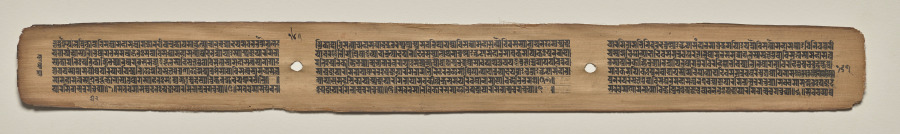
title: Text, folio 167 (verso), from a Manuscript of the Perfection of Wisdom in Eight Thousand Lines (Ashtasahasrika Prajnaparamita-sutra)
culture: Eastern India, Bihar, Vikramashila Monastery. Painting: Nepal, Kathmandu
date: Sunday, September 14, 1119 (year 239 of the Newar Samvat in the month of Ashvina)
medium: gum tempera and ink on palm leaves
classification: Painting